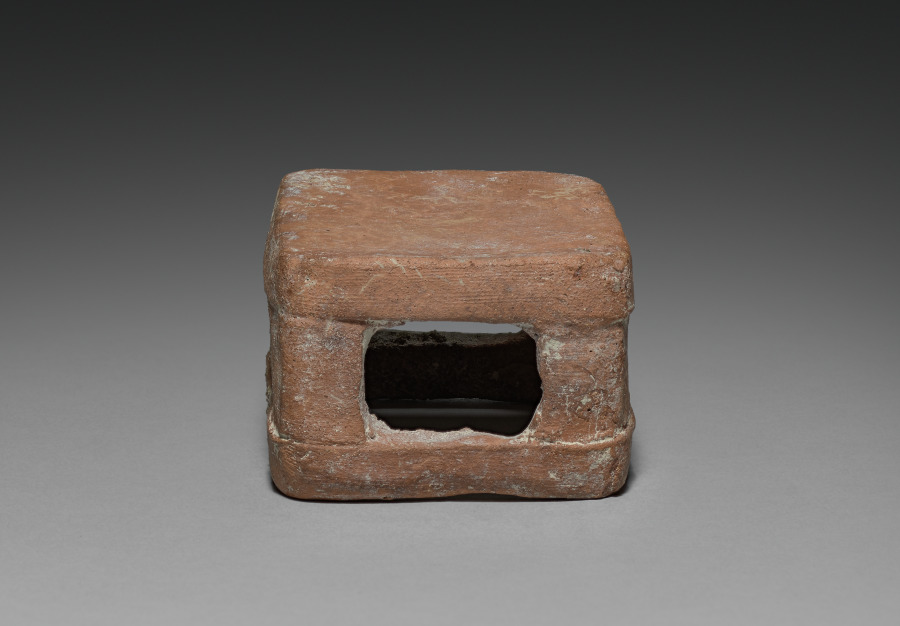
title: Seated Lord with Removable Headdress: Stool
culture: Mesoamerica, Maya, probably Jaina Island, Late Classical period, 7th-9th century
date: 600–800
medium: ceramic and slip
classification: Ceramic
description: The major Maya grave offerings on Jaina Island were ceramic figurines that depict deities and humans in a variety of roles. The stool belongs to a seated figure who represents a male, perhaps another warrior, who wears a huge zoomorphic headdress.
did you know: It is estimated that some 20,000 people were buried on the tiny island of Jaina over a 500-year period.